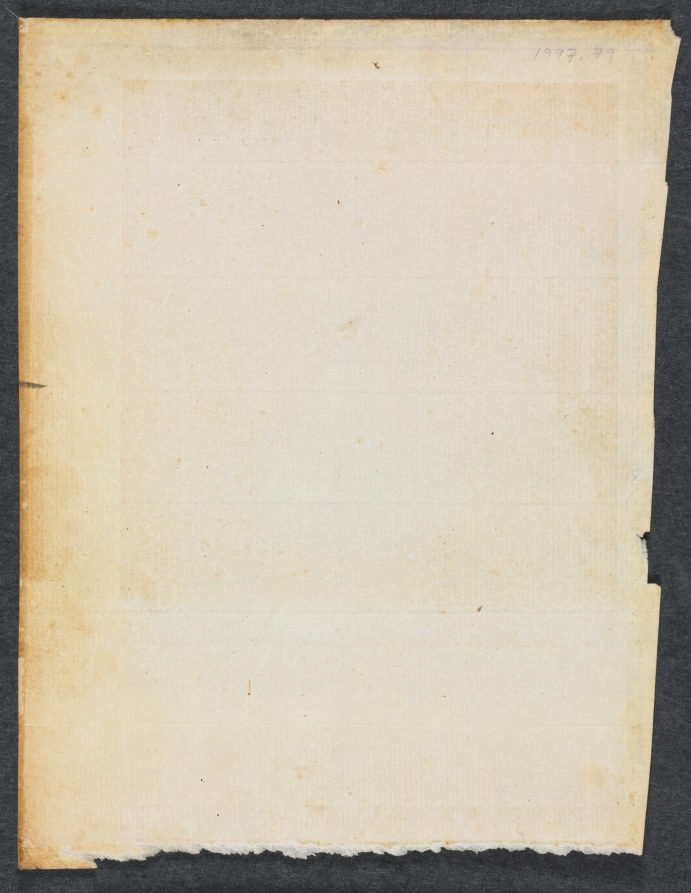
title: Portrait of Sir Captain West of the Dutton Indiaman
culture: England, 18th century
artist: John I Smart (British, 1741–1811)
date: 1785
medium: watercolor over traces of black chalk, with metallic gold paint on laid paper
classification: Portrait Miniature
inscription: by artist, across bottom, in brown ink: Captain West of the Dutton Indiaman 1785 / drawn on board going to Madras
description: Smart painted Captain West’s head in profile, turned to the right. His powdered hair is worn en queue with curls above his ears and white powder on his shoulders. He has long eyelashes, parted lips, and a grayish cast to his skin tone, particularly over his beard. West dons a blue coat with gold buttonholes embroidered in gold and a white waistcoat, high collar, and cravat tied in a small bow. This work is a finished drawing by Smart, evidenced in part by its larger size and by the fact that the painting of the sitter’s clothing is complete and the bust is placed within an elaborate border comprised of blue, metallic gold, and gray lines. This finished quality does not preclude the possibility that the drawing may also have functioned as a preparatory sketch for a miniature on ivory, which has not been located. Captain James West sailed the Dutton Indiaman from England to Madras, India, on several occasions, including Smart’s voyage in 1785. At least one of the sons of British judge Sir Elijah Impey was traveling with Smart on his journey to India and had his portrait taken by the artist. Another of Impey’s sons wrote of an earlier return passage to England made with Captain West in 1784, shedding light on the sea captain’s character and disposition. Impey’s account conveys not only West’s personality but the atmosphere that prevailed on the ship over which the captain presided and on which Smart traveled and worked. As indicated by an inscription in the artist’s hand, this portrait was painted by Smart while he was aboard the Dutton en route to Madras and probably retained by the artist as a memento. In addition to the portrait of “Master Impey,” Smart is known to have taken the likeness of other figures while aboard the Dutton, including the quartermaster “Baker” and a French ship called the Consalateur, which was intercepted by the Dutton while sailing to India. The current location of both works is unknown.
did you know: In 1784 it was written that "Captain James West, had the just reputation of being a first-rate mariner, a well-informed, and thoroughly practical man of business, and in every way worthy of confidential intimacy."